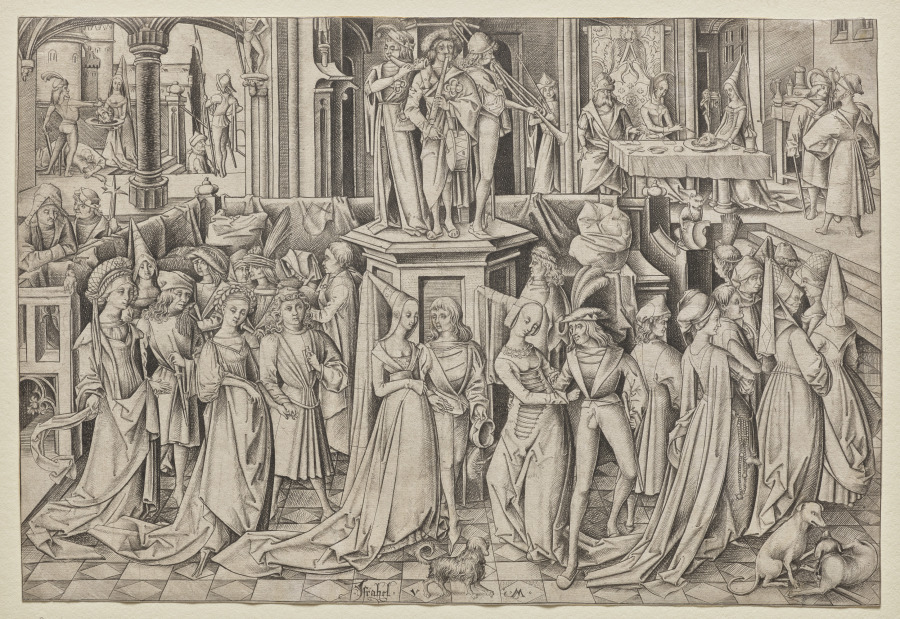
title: The Dance at the Court of Herod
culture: Germany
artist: Israhel van Meckenem (German, c. 1440–1503)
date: c. 1500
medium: engraving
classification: Print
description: In this imaginative composition, Meckenem combines John the Baptist’s beheading with a courtly promenade. The religious narrative’s gruesome episodes occur in the background, where Salome collects the saint’s severed head on a platter and then presents it at Herod’s banquet table. Salome appears a third time in the foreground, where she dances with a lusty suitor who grabs her waist instead of politely holding her hand.